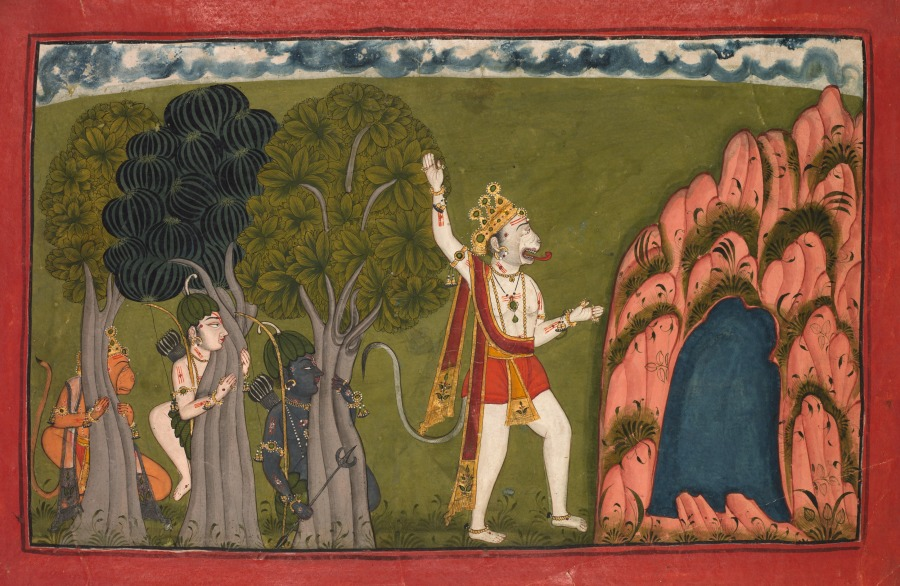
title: Sugriva challenges his brother Vali, King of the Forest Dwellers, to a duel, folio 10 from the Kishkindha Kanda (Book of Kishkindha) of a Ramayana (Rama’s Journey)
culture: Northern India, Pahari kingdoms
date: c. 1700–1720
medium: Gum tempera, ink, and gold on paper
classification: Painting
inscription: [[verso, in Sanskrit]] evamuktastu sugrīvo rāmeṇa ripu ghātina gachāmī tpajavī hṛīshṛī ghayā tāsteya satvaram. kiṣkimdhyaṁ tvaritaṁ gatvā deshe pādapa saṁkule. vṛikshairātmā tamāvrīptate tiṣṭha nāhate chate. atha rāmo javī tatra sugrīvaṁ priyavādi namra. kurunadaṁ guhādvāri sthitva tvama kuto bhayaḥ. vali taṁ chaṣkaya yathā niṣyate ta guhā mukhāt. tamahaṁ niha niṣyā miśareṇā śani varcasā. evamuktetu vacane kākusthe nāmi tau jasā. nādaḥ [a]sti gadhotha gambhīro mahānā sītthadā divi. mālāca kāṁcanī divyānā nā ratnā vibhūṣitā. divaḥ sugrīva mūrchānama bhito nipa pātaha. sāca pitrā sutaste hādā ditpe na divau kasā. vāli no mālayā tulyā sutaste hai nirmitā. tato nadanmahānādaṁ valiṁ samāiyat. sugrīvo gaḍha saṁvīto nā daiṁrmi danti vāṁvaram. ityārthe rāṃyaṇo kiṣkiṁdhākāṁde valī samāhvanaṁ.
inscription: [[verso, left center, in Devanagari script]] 10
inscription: [[verso, bottom center, in Takri script]] 10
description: In a morally ambiguous scene, the white monkey Sugriva calls to his brother Vali, the rightful king of the forest-dwellers, to emerge from a cave. Behind him, the blue hero Rama hides with his brother and monkey ally Hanuman. Clutching a deadly three-pronged arrow, Rama prepares to slay Vali, so Sugriva will rise as king and be obliged to help locate Rama’s lost wife. Paintings from this series illustrate a local Himalayan Ramayana. Their distinctive style incorporates rock formations and textiles reinterpreted from Mughal sources, probably brought to Nurpur when the Mughal emperor retreated there during the hot season.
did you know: The orange monkey Hanuman and the princes Lakshmana and Rama hide behind trees while Sugriva calls for Vali.